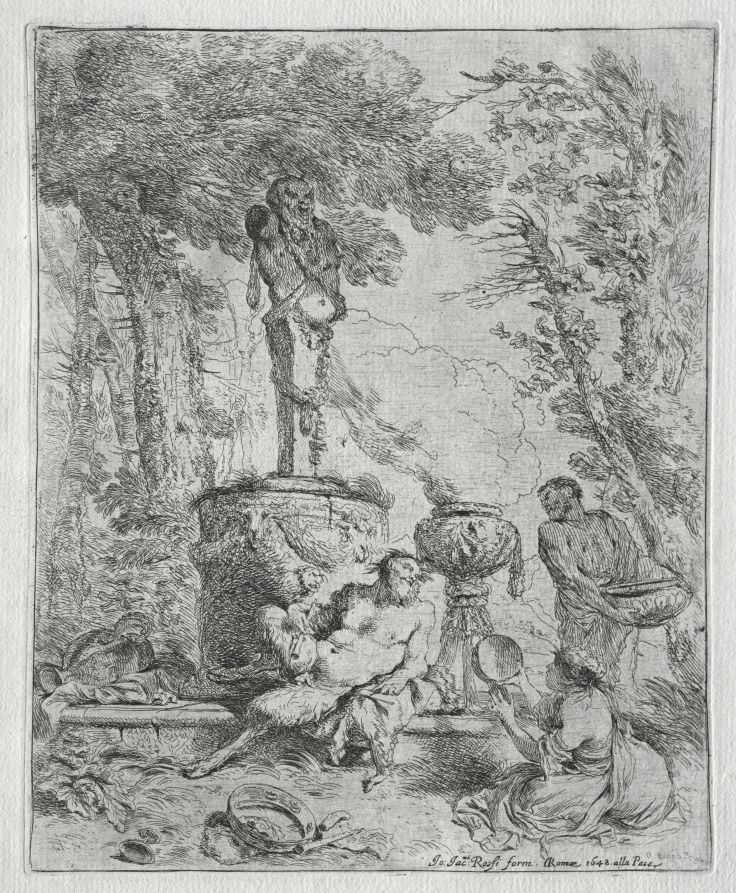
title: Fete of Pan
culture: Italy, 17th century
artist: Giovanni Benedetto Castiglione (Italian, 1609–1664)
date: 1648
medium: etching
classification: Print